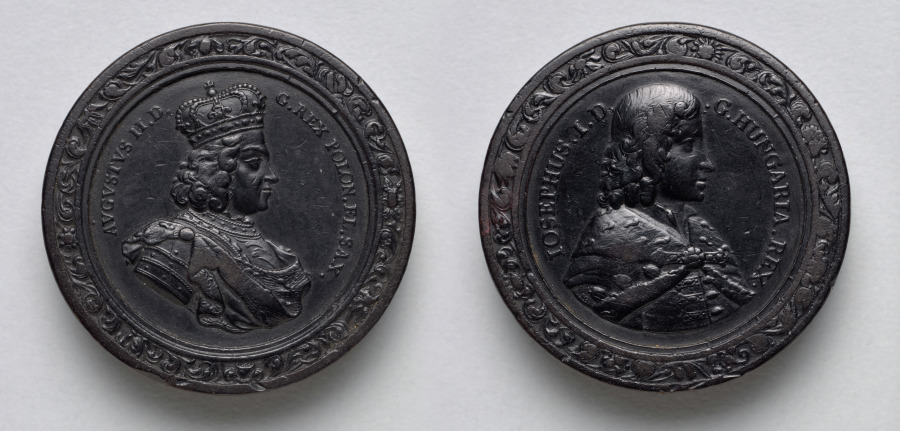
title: Gaming Piece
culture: Germany, late 17th-early 18th Century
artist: Martin Brunner (German, 1659–1725)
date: c.1700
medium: wood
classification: Furniture and woodwork